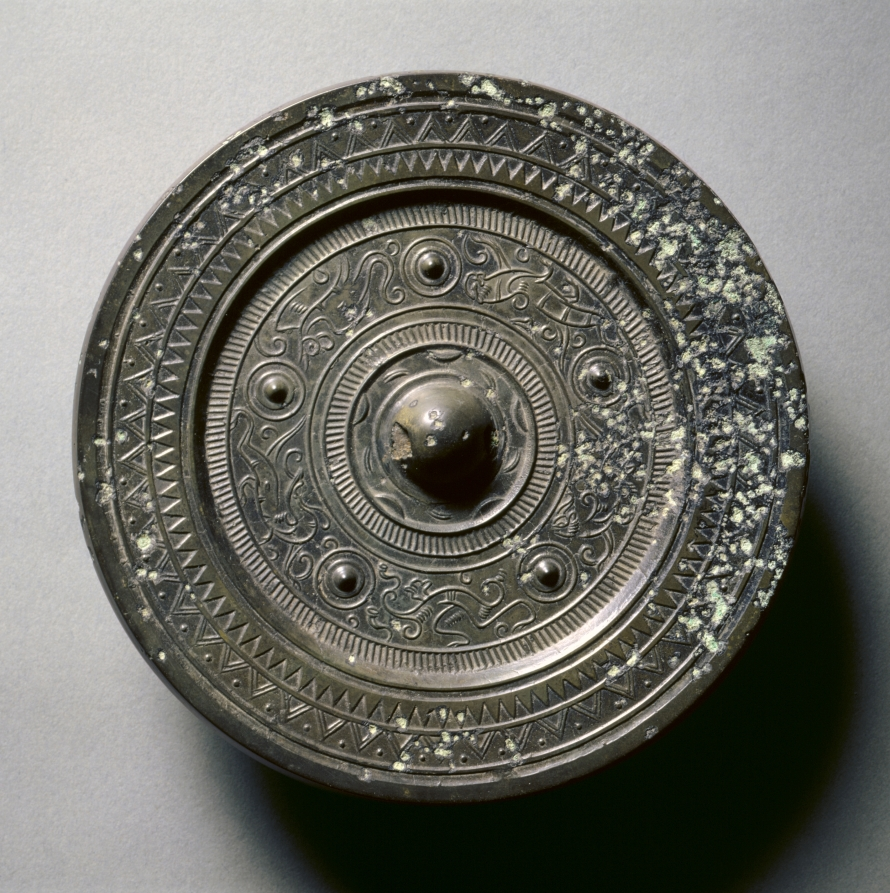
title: Mirror with Concentric Circles, an Immortal, and Auspicious Animals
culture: China, Western Han dynasty (206 BCE–8 CE)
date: 100 BCE–100 CE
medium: bronze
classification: Metalwork